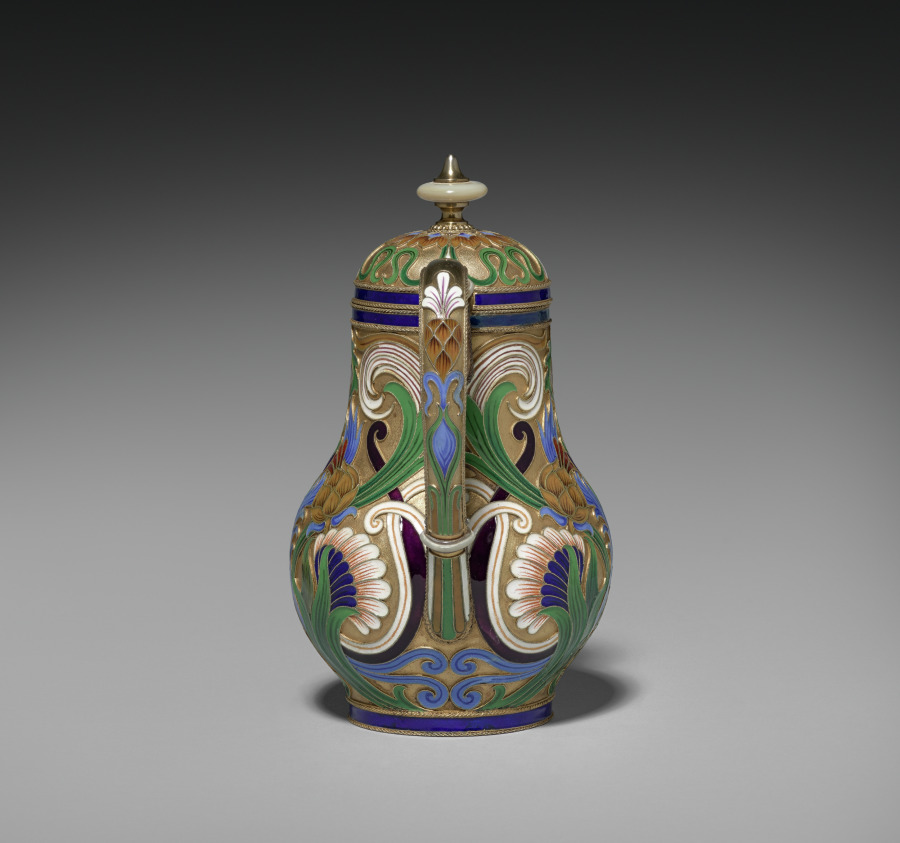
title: Covered Hot Water Pot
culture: Russia, St. Petersburg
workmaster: attributed to Feodor Ivanovich Rückert (Russian, 1840–1917)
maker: House of Fabergé (Russian, 1842–1918)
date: 1887–96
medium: silver gilt, opaque cloisonné enamel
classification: Miscellaneous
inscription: 88, St. George [assay mark for Moscow, 1882-1896]; C. Fabergé (in Cyrillic); double-headed eagle [imperial warrant]; 88; initials of Carl Fabergé (in Cyrillic).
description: Fabergé’s craftsmen in Moscow, especially under the watchful eye of workmaster Feodor Rückert, became known for their work in the pan-Slavic or neo-Russian style, hearkening back to 17th-century motifs of Russian folk art. Often on rather conventional shapes, Rückert and his silversmiths created an explosion of color, achieved through the historic technique of cloisonné enamel in which tiny metal lines are soldered to the surface then filled with glass powders in various colors and fired to create a high gloss finish. The result is a spectacular evocation of the 17th-century originals. Far from mere copies, however, Rückert's designs, such as this tea service, employ naturalistic or abstract motifs in a thoroughly modern adaptation of a remarkable earlier period of Russian art and decoration.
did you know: This covered hot water pot is part of a larger tea set.